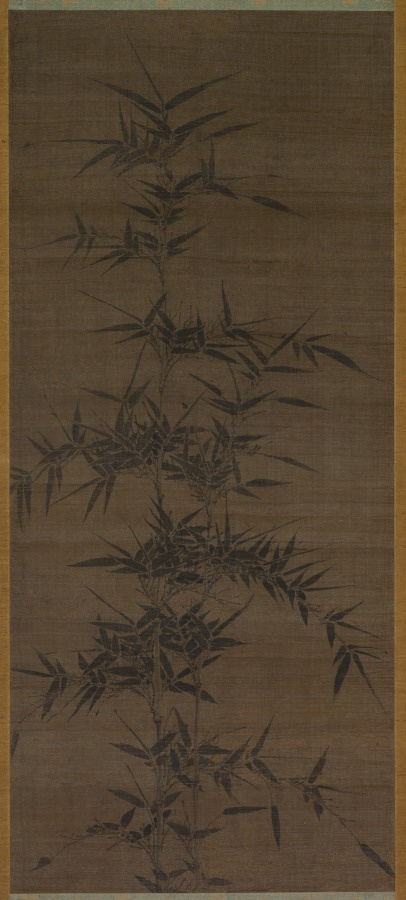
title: Ink Bamboo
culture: China, Southern Song dynasty (1127-1279)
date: 1200s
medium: hanging scroll; ink on silk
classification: Painting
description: This deceptively simple composition features two upright stalks of bamboo with leafy stems extended to fill the silk. The painter sensitively balanced ink tones and brushstrokes. The leaves that cross in front of other leaves are outlined in clear silk.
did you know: In traditional Chinese culture, bamboo symbolizes a gentleman's virtuous resilience and flexibility.